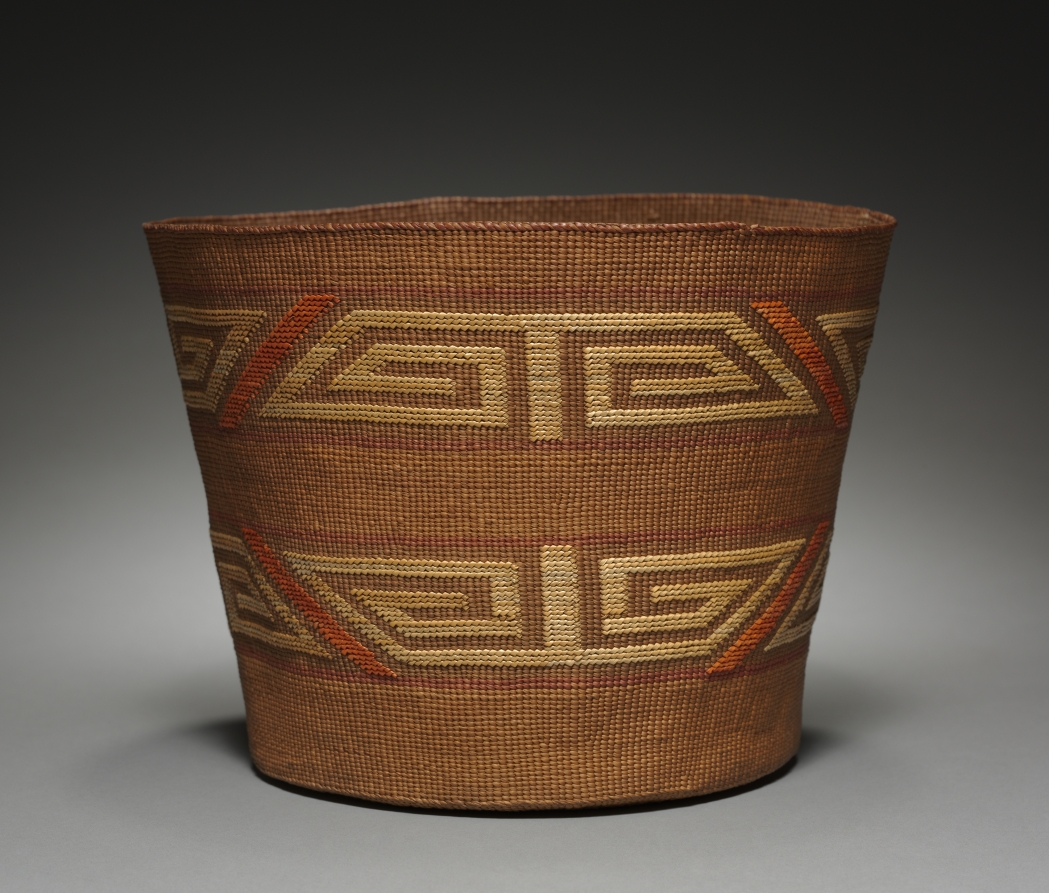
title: Bowl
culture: Northwest Coast, Tlingit, 20th century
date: before 1942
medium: twined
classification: Basketry